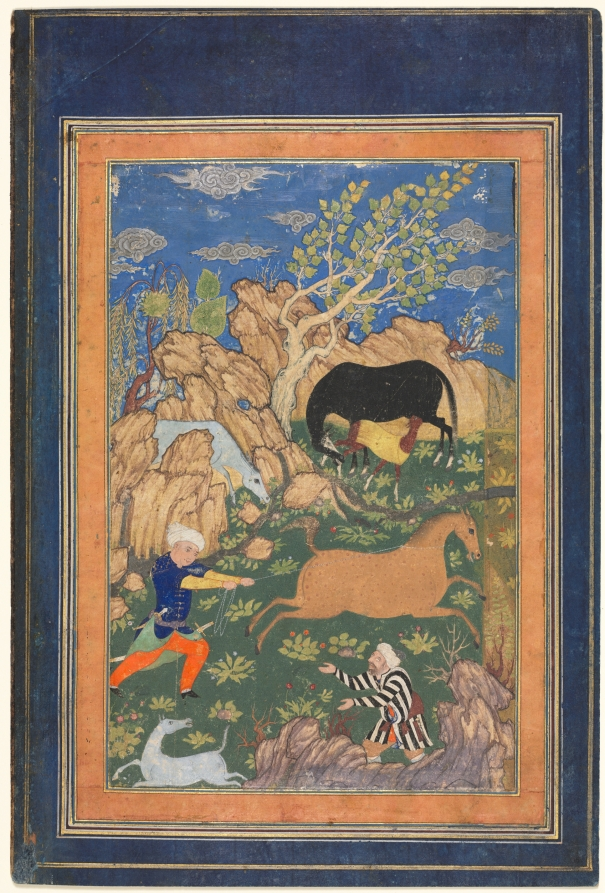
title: Rustam Lassoing his Horse, Rakhsh, in a Landscape (recto)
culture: Afghanistan, Herat or Iran, Qazvin, Timurid period (1370–1501) or Safavid period (1501–1722)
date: 1400s-1500s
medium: opaque watercolor, gold, and silver on paper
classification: Manuscript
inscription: Script: none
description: The handsome youth lassoing the feisty colt in this painting is Rustam, the Shahnama's most popular hero. A favorite episode for artists, this event marks a turning point in the fortunes of Iran and offers a wonderful pictorial opportunity. It occurs in a time of trouble for Iran—the throne is empty and a foreign army has invaded the land. The country needs a mighty warrior to fight for her, and the young Rustam is ready for the challenge—once he finds a horse that can bear his enormous weight! The herds are gathered for Rustam's inspection: a piebald bay colt catches his eye. For three years no one has been able to capture the colt, known as "Rustam's Rakhsh." Rustam asks what price the herdsman wants for him. The reply: "If you are a true Rustam—a true 'deliverer'—mount him and make the land of Iran aright. The cost of Rakhsh is the soil of Iran and the deliverance of the world!"